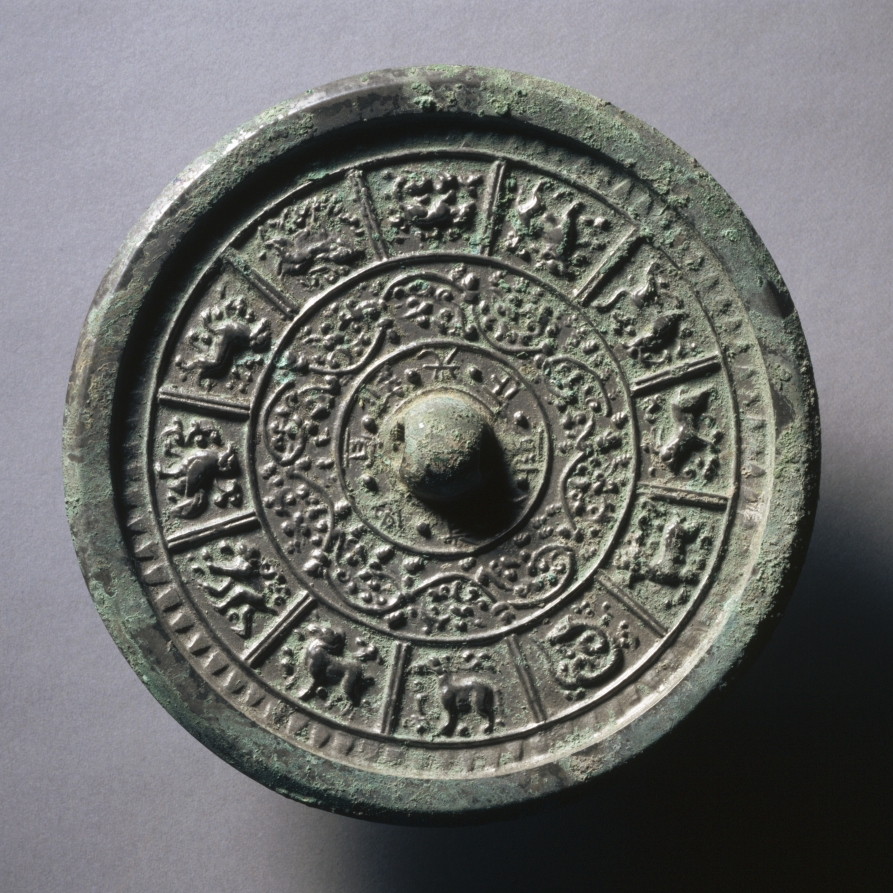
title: Mirror with Interlacing Floral Motifs and Twelve Zodiac Animals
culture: China, Sui dynasty (581-618)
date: late 500s–early 600s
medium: bronze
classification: Metalwork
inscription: 光正隨人，長命宜新。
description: The design of this mirror consists of a central knob and a series of concentric circular bands. The innermost band contains an eight-word inscription, with phrasing typical of earlier mirrors found in the Sui and early Tang periods: The mirror's light shows the man inside. May you live a long life and [constantly] renew yourself. Floral branches interlace in the second band. The controlled undulation produces five segments. The third band is divided into twelve parts, which house the zodiac animals in the clockwise sequence: rat, ox, tiger, hare, dragon, snake, horse, sheep, monkey, cock, dog, and boar. A sunken ring of the well-known sawtooth design continues to be effective, before the undecorated rim sets the final enclosure.